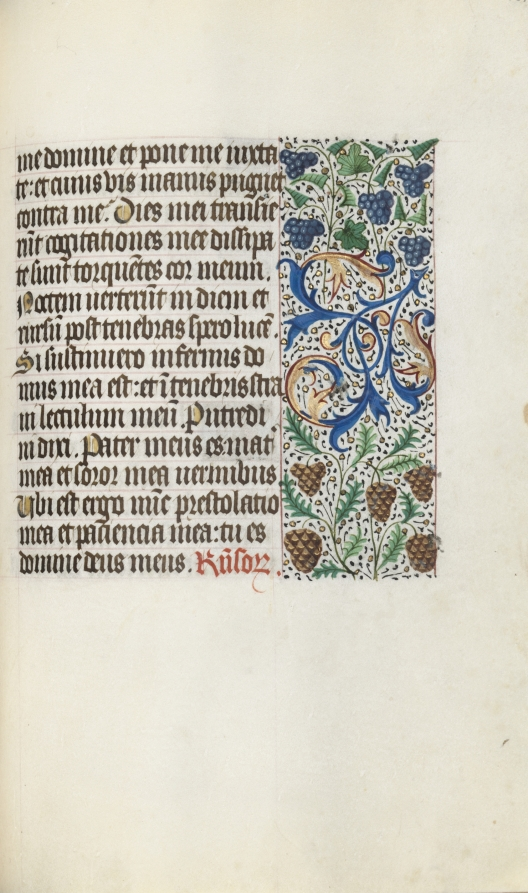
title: Book of Hours (Use of Rouen): fol. 131r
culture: France, Rouen, 15th century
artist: Master of the Geneva Latini (French, active Rouen, 1460–80)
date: c. 1470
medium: ink, tempera, and gold on vellum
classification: Bound Volume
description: In the late 1400s and early 1500s Rouen was an established and important center of book production. The city’s cathedral had a wealthy chapter that spent large sums of money to commission books and to maintain its extensive library. The stationers and booksellers would have likely been concentrated in or near the cathedral precinct. This artist, named after a manuscript now in Geneva, was Rouen’s principal illuminator during the second half of the 1400s.